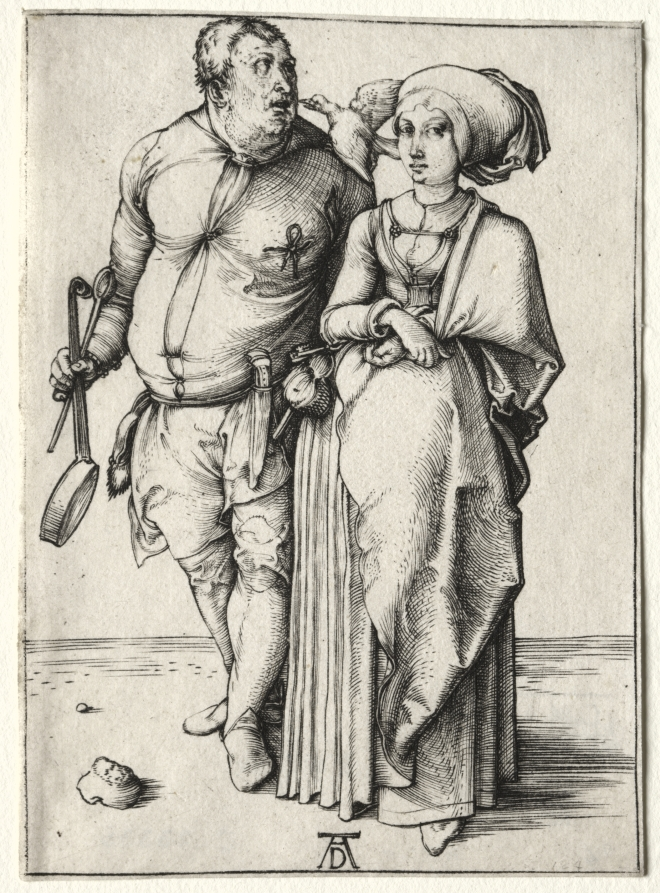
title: The Cook and His Wife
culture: Germany, late 15th-early 16th Century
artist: Albrecht Dürer (German, 1471–1528)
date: probably 1497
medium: engraving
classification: Print